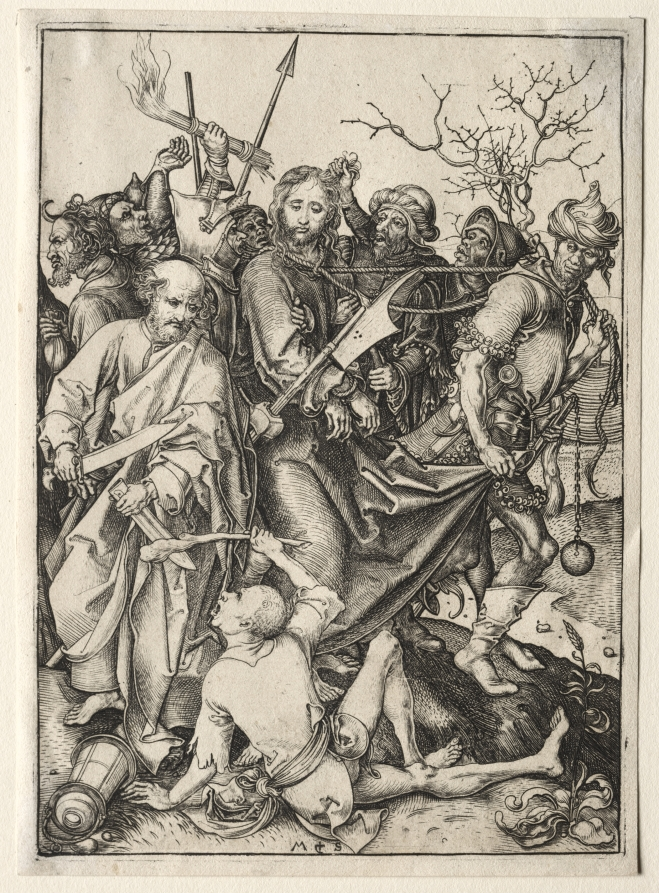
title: The Passion: Christ Taken Captive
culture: Germany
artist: Martin Schongauer (German, c. 1450–1491)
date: c. 1480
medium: engraving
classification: Print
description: Martin Schongauer's series of the Passion of Christ was his largest set of engravings, made around 1480, and extensively copied across Europe. It consists of twelve prints detailing the suffering of Christ in the last days of his life. Schongauer's version focuses on crowded scenes, grotesque physiognomies of Christ's tormentors, and great pathos in the compositions. Here, Christ—with his hands tied—is led away with a rope around his neck by one of his captors. A second soldier seizes him by his left arm, and a third one grasps a lock of his hair. In the foreground, Peter, in an attempt to save Christ, cuts the ear of the soldier Malchus with his sword. Judas, instead, flees with his bag of silver at left.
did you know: Though the Roman soldier on the right holds a ball and chain weapon (or flail), such weapons are not known to have been used by the Roman military.